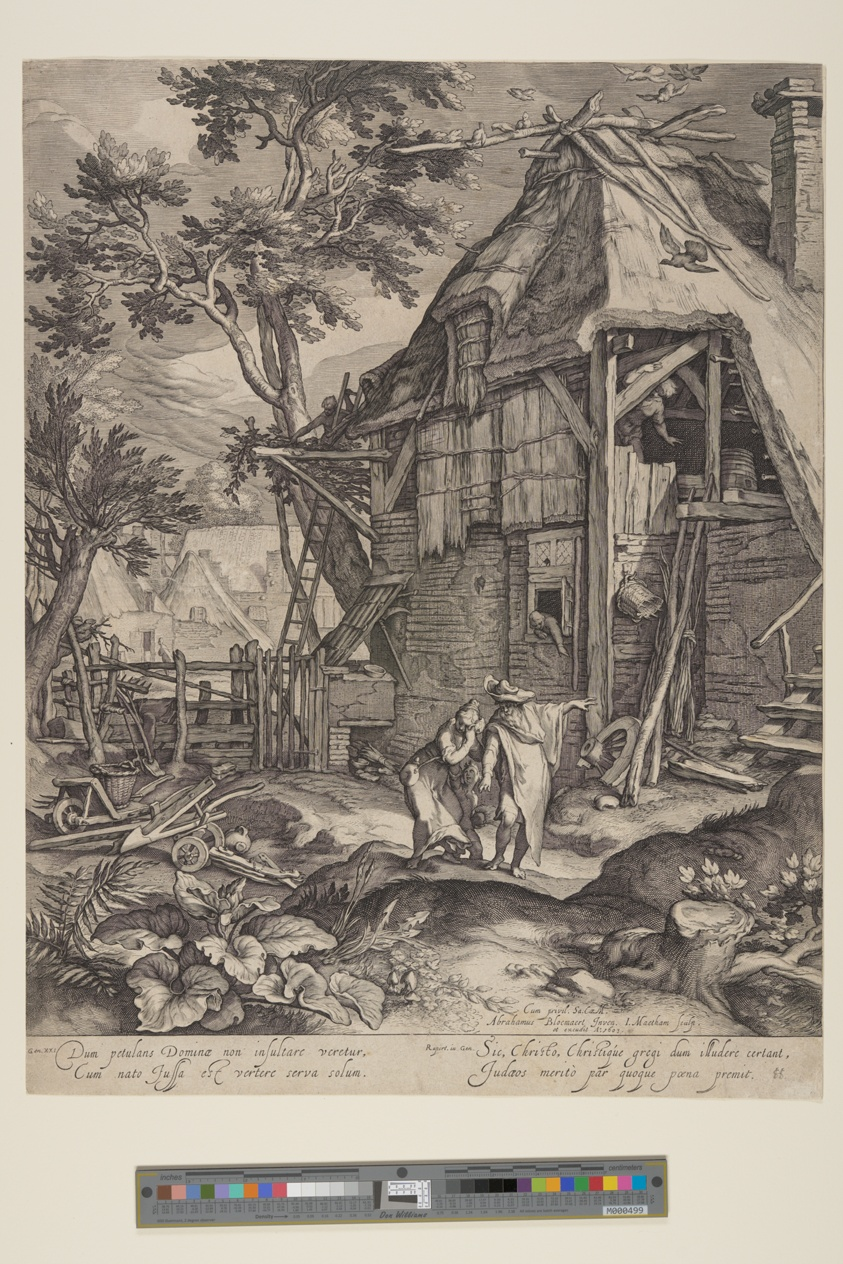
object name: Print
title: Abraham Casting out Hagar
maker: Jacob Matham (Dutch, 1571–1631); after Abraham Bloemaert (Dutch, 1566–1651)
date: 1603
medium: Engraving on ivory laid paper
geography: Netherlands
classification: engraving; paper; print; prints and drawing